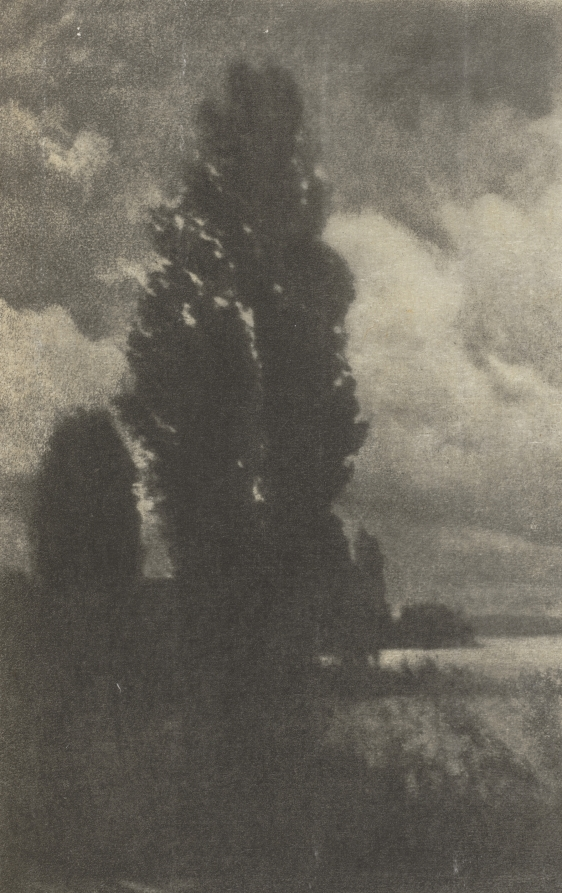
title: Camera Work: Poplars and Clouds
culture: Austria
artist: Hans Watzek (Austrian, 1848–1903)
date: 1906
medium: photogravure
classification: Bound Volume